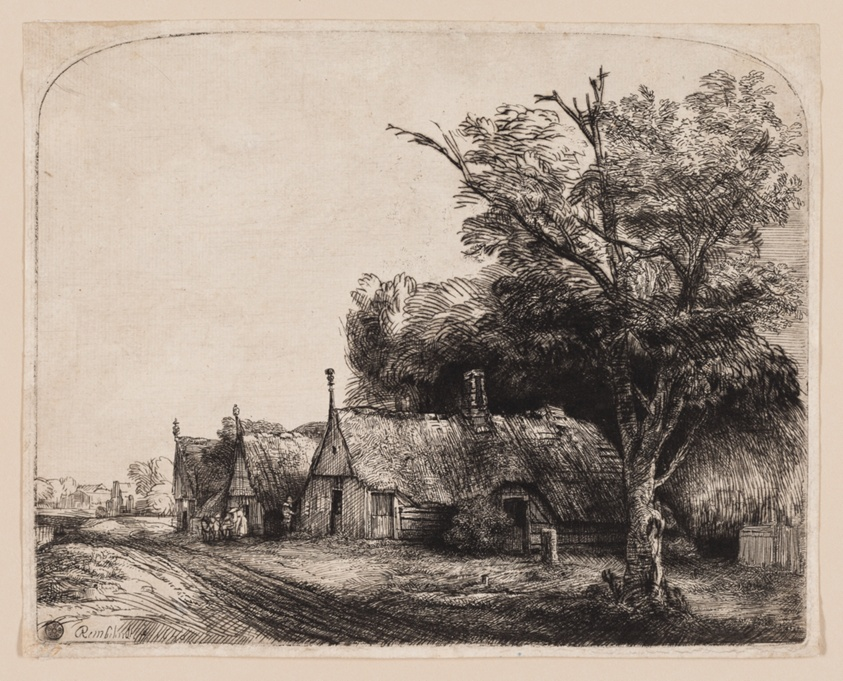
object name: Print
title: Landscape with Three Gabled Cottages Beside a Road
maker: Rembrandt van Rijn (Dutch, 1606-1669)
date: 1650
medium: Etching and drypoint in black on cream laid paper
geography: Holland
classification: etching; print; prints and drawing; paper; drypoint